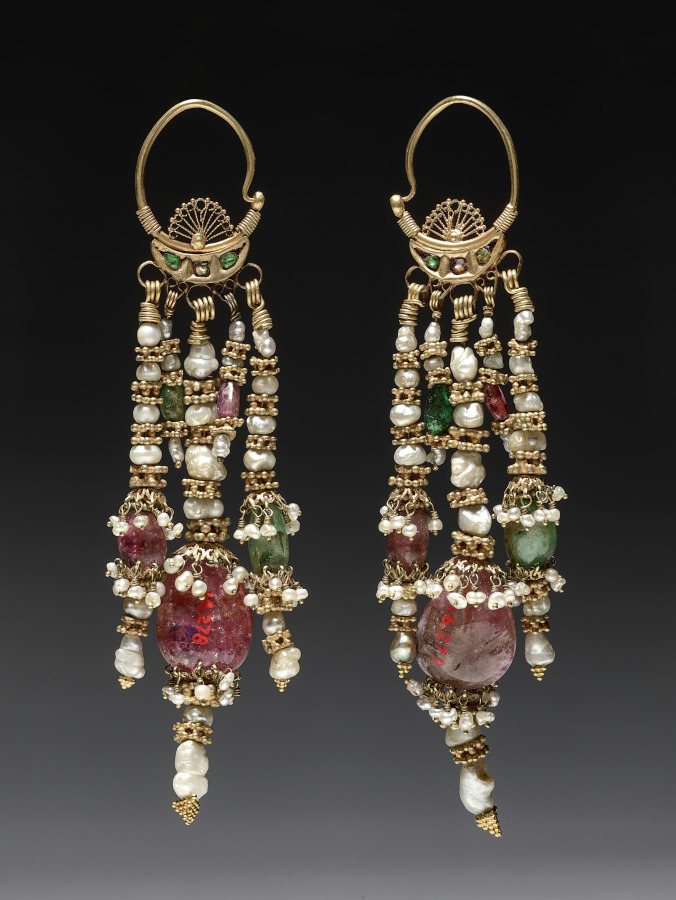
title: Pair of Earrings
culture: Uzbekistan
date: 1700s–1800s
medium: silver gilt with pearls, gold beads and crystal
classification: Jewelry